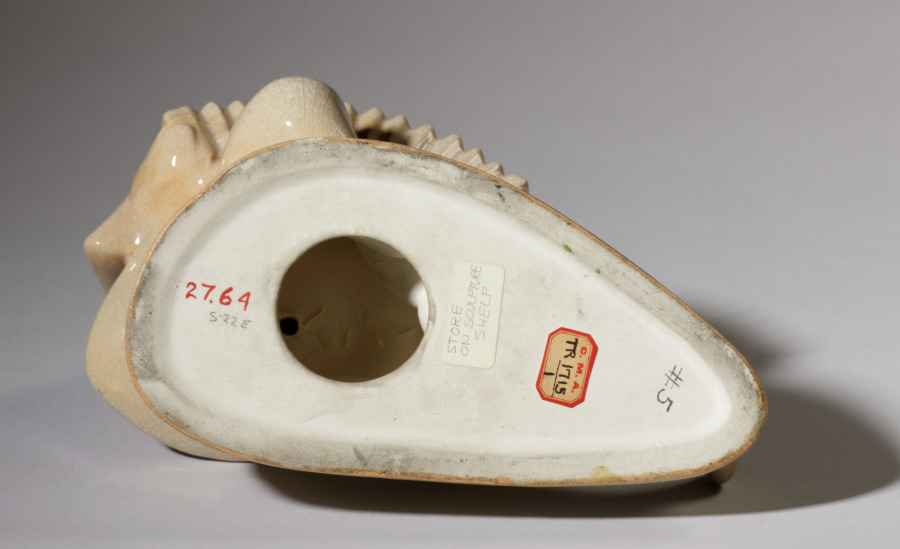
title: Accordion Player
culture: America, Ohio, Cleveland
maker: Cowan Pottery Studio (America, Rocky River, Ohio, 1920–1931)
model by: Alexander Blazys (American, born Russian Empire [now Lithuania], 1894–1963)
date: 1927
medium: mold-made ceramic, glazed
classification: Ceramic